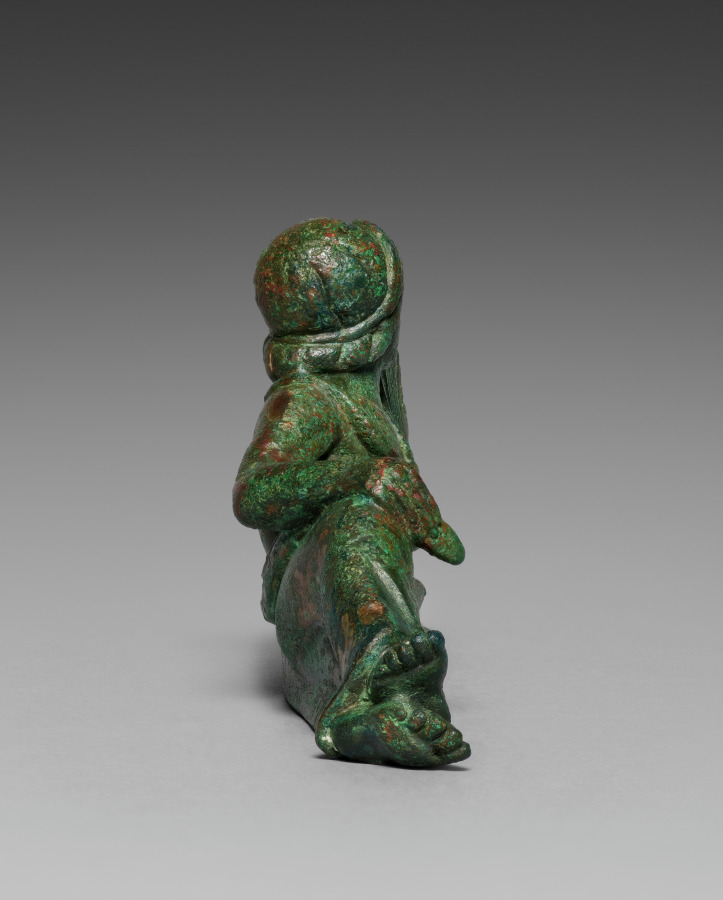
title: Vessel Ornament of Reclining Lyre-player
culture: Etruscan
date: probably 400–375 BCE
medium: bronze with gilding traces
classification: Sculpture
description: This bronze banqueter figurine was one of six once adorning the rim of a large basin, now lost. Cast in molds with individualized details, most have grooves on their underside to attach to the basin. Minute traces of gilding remain on areas of clothing and skin (mostly visible only under magnification), suggesting that they may have been completely gilded. Two handles in the form of hippocampi, horses with serpentine tails, also belonged to the basin and are now displayed at the Michael C. Carlos Museum at Emory University. The basin may have been used to hold liquid for a banquet, or was perhaps funerary. This reclining banqueter holds a lyre in his left hand and an oblong pick in his right hand. His face tilts toward the lyre and garlands hang around his head and chest. Two bare feet emerge from the bottom of the himation in a position distinct from the feet of the other figurines in this group. Some gilding remains on the top edges of the lyre and on the banqueter’s lips and drapery.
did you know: The lyre held by this banqueter bears traces of gilding.